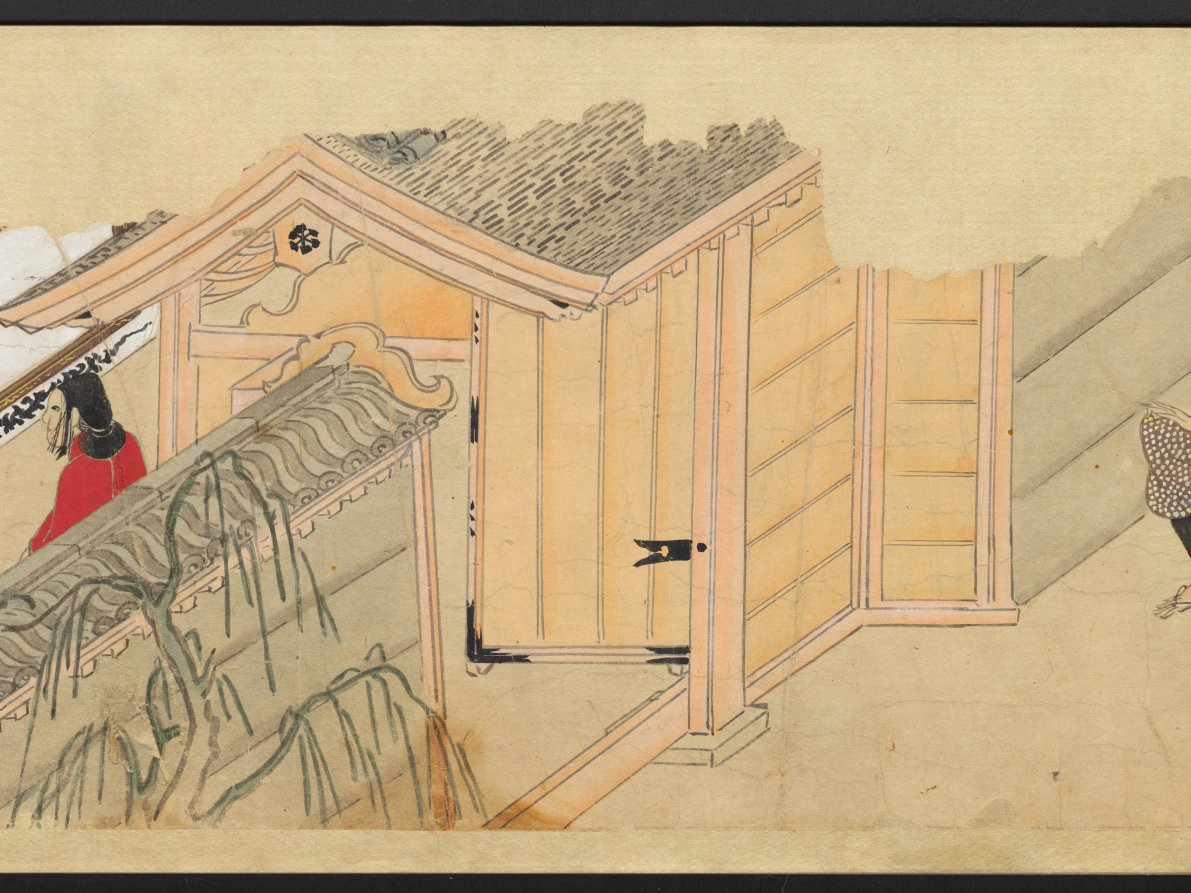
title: The Saltmaker's Story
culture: Japan, Edo period (1615–1868)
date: early 1600s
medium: One of a pair of handscrolls; ink, color, and gold on paper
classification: Painting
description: Once read and copied by girls at New Year’s celebrations and included in dowries, The Saltmaker’s Story is a rags-to-riches tale in which daughters are gifts from the gods. Despite his simple outlook, the main character progresses from humble roots as an associate at Kashima Shrine to the elite status of grandfather of the emperor through the intervention of the Kashima deity. The Saltmaker’s Story is traditionally presented in a set of three scrolls, but the text of this set has been removed by a previous owner, who remounted the illustrations as a pair. The paintings of this one take us from right to left through the second half of the tale.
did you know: This handscroll originally had texts before its paintings, but the texts were removed.